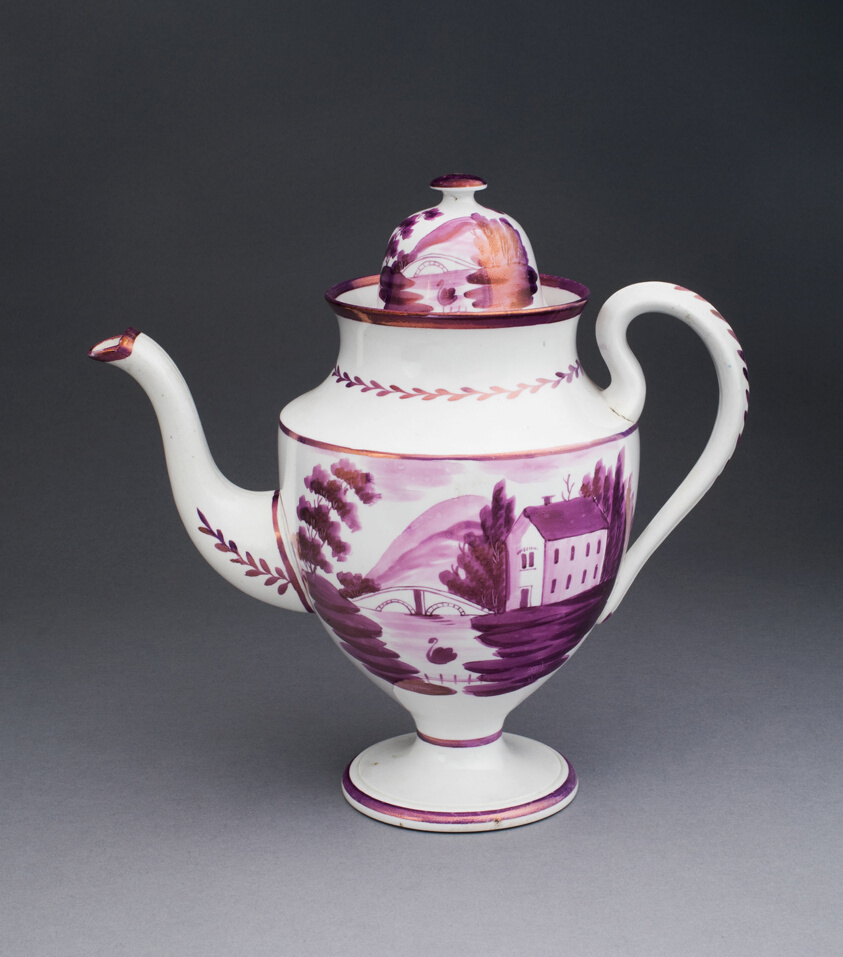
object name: Ceramics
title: Coffee Pot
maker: England, Staffordshire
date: c. 1820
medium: Lead-glazed earthenware with purple lustre decoration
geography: Staffordshire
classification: earthenware; european decorative arts; ceramics